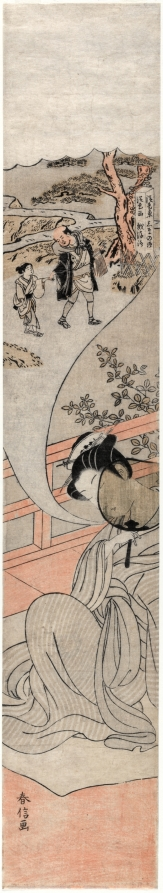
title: Courtesan Dreaming of her Childhood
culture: Japan, Edo period (1615–1868)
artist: Suzuki Harunobu (Japanese, 1724–1770)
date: c. 1770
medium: Woodblock print; ink and color on paper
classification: Print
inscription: Signature: Harunobu ga.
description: This print depicts a courtesan dreaming about the time she was taken from her family to become a courtesan. The man leading the girl by the hand is probably escorting her to the Yoshiwara, the entertainment district in Edo. This format is called a pillar print, or hashira-e (literally, "pillar picture"). It is made by pasting two sheets together vertically to form a long, narrow picture, often hung as a decoration on the narrow support posts of the interior of Japanese houses.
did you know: Pillar prints, or hashira-e (柱絵), are long and narrow Japanese woodblock prints originally intended to decorate wooden pillars.